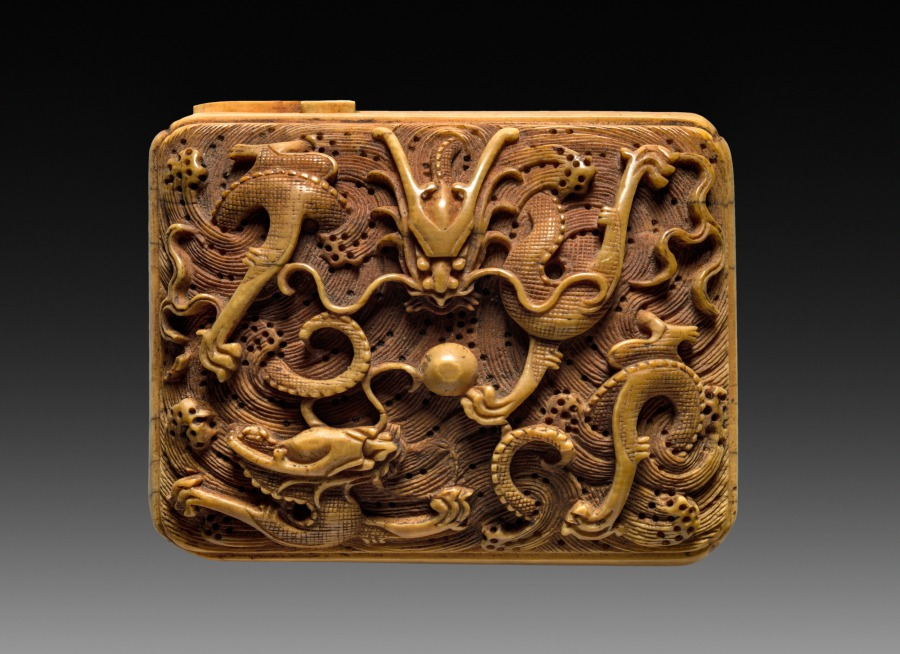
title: Buckle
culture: China, Qing dynasty (1644-1911)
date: 1700s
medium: ivory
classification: Ivory